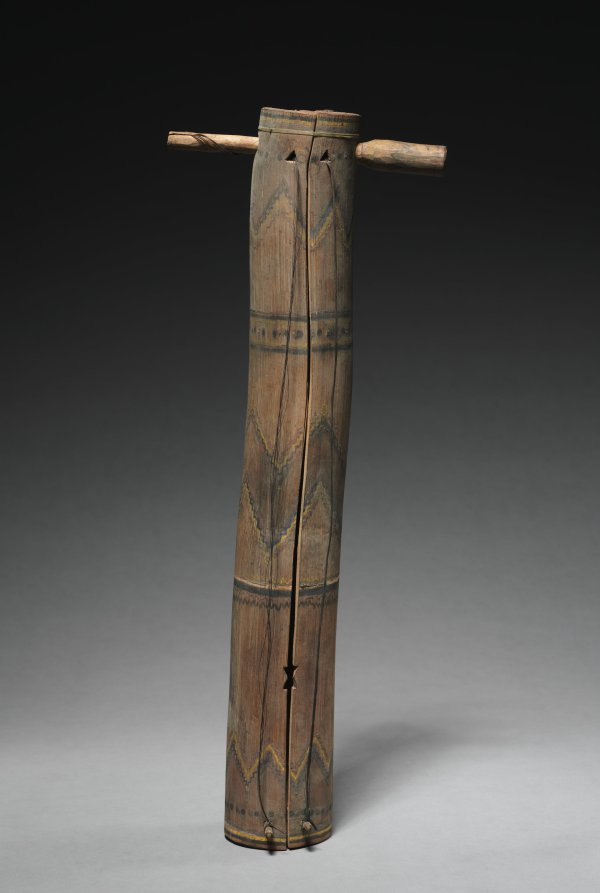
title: Fiddle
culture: America, North American Indian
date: 20th century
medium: wood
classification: Musical Instrument